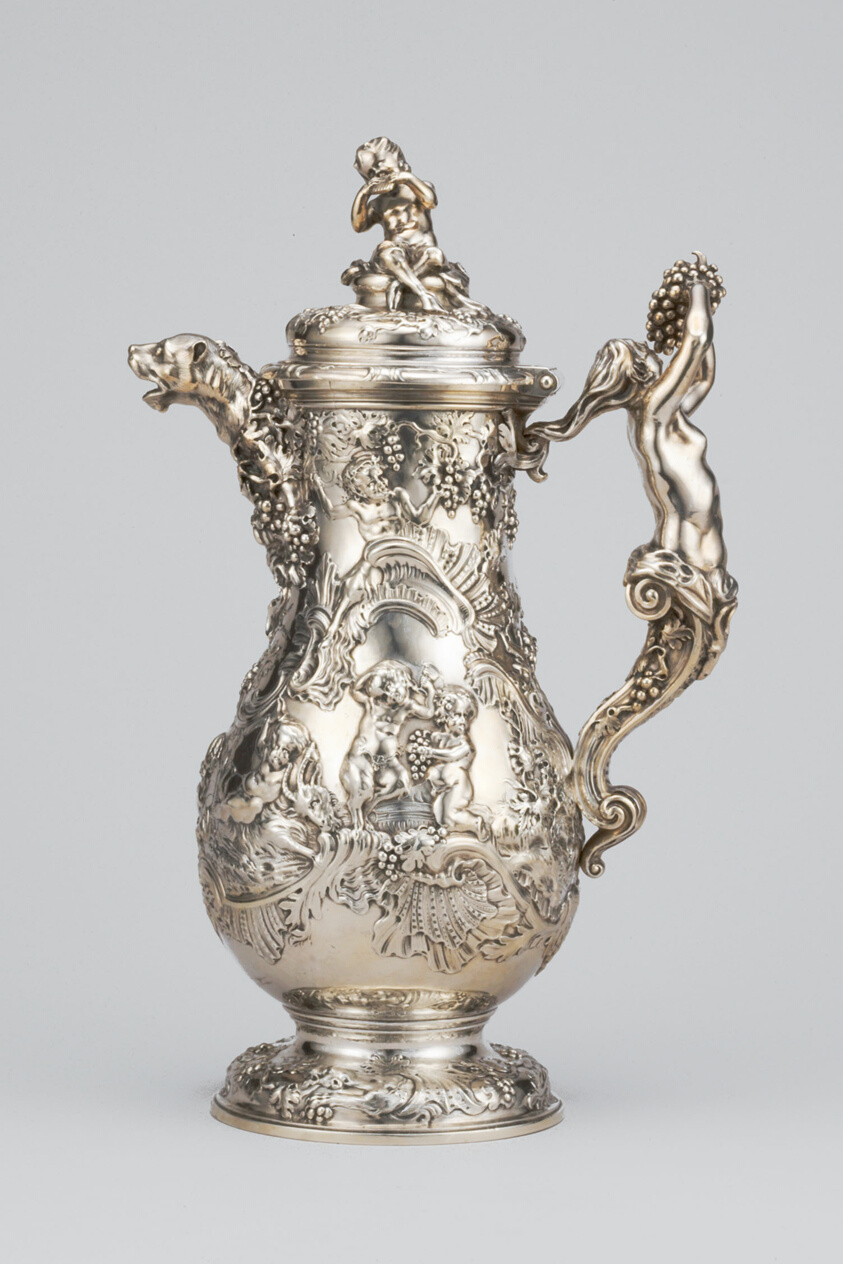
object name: Metalwork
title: Wine Jug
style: Rococo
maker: Charles Frederick Kandler; English, born Germany, active 1735–c. 1778; London, England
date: 1739–40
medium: Silver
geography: London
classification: vessel; jugs (vessels); decantor jugs; metalwork